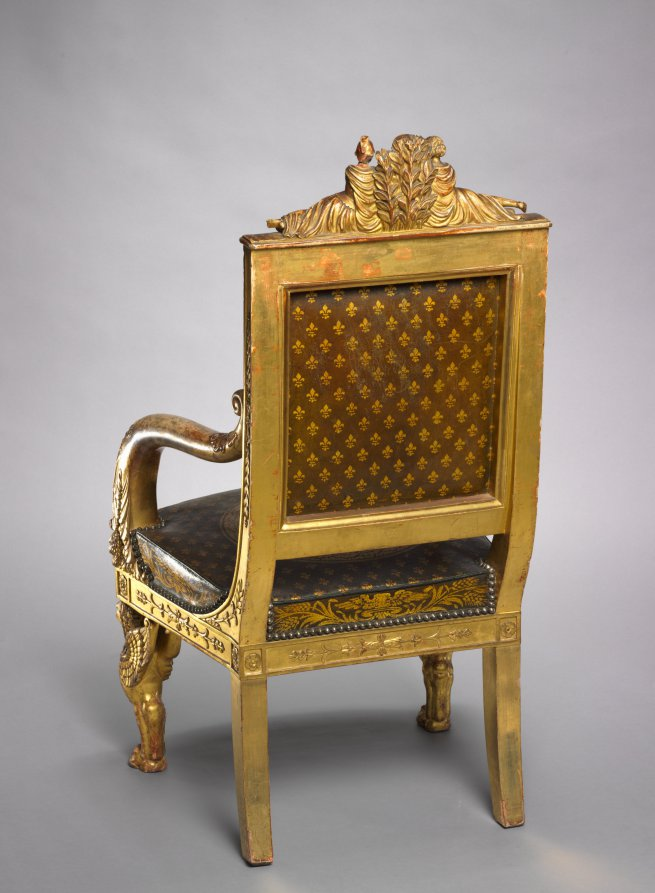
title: Child's Throne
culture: France, Paris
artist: Pierre-Marie Balny le Jeune (French, 1832)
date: 1822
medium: carved and gilded wood, leather upholstery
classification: Furniture and woodwork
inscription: inscribed with stencils inside back rail: BLONDEL TAPISSIER/RUE ST. ANTOINE N 72 1822 inscribed in ink lower edge back rail: 12 JANVIER 18[22?]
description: This chair was made for the young, presumed successor to the French throne who ruled briefly as Henri V in 1830, the last of the direct Bourbon line. He is depicted at the center of the top rail protected by female figures representing France and Minerva, the Roman goddess of wisdom. Fleurs-de-lis and the Gallic rooster, symbols of French royalty and the French people, decorate the upholstery.